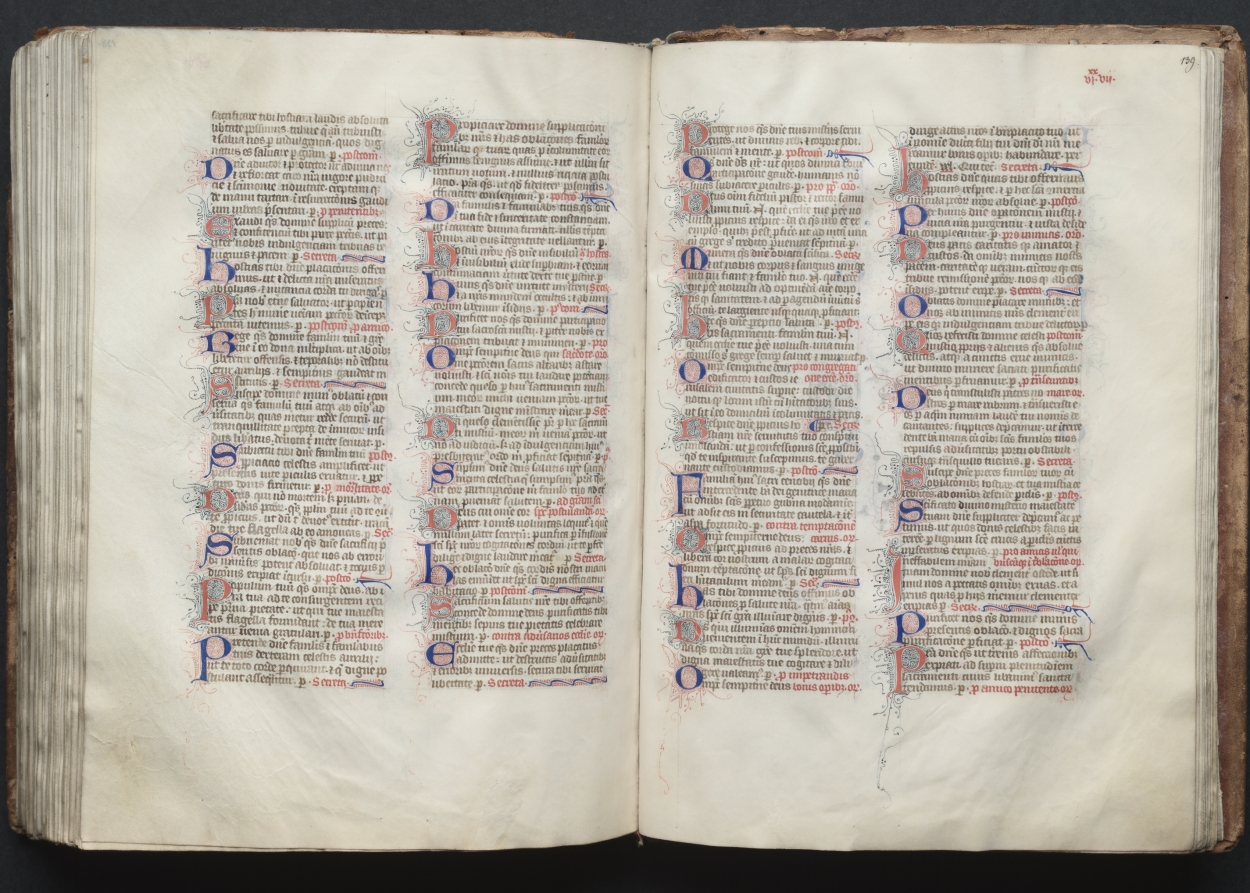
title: The Gotha Missal: Fol. 139r, Text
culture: France, Paris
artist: Master of the Boqueteaux (French)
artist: and Workshop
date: c. 1375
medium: ink, tempera, and gold on vellum; blind-tooled leather binding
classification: Bound Volume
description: The style and quality of this manuscript's decoration is typical of deluxe Parisian books made for aristocratic or royal patrons. Most of the book's decoration appears to be the work of the Master of the Boqueteaux, an artist active at the court of King Charles V (died 1380). His style was apparently shared by a number of book illuminators working in and around Paris. It is very possible that the Gotha Missal belonged to Charles V, but is not provable because the manuscript has no royal portraits and lacks a colophon. Given the book's magnificent decoration, however, it would seem that it was produced for a Valois prince, if not for the king himself. The manuscript receives its name from the German dukes of Gotha, its later owners.